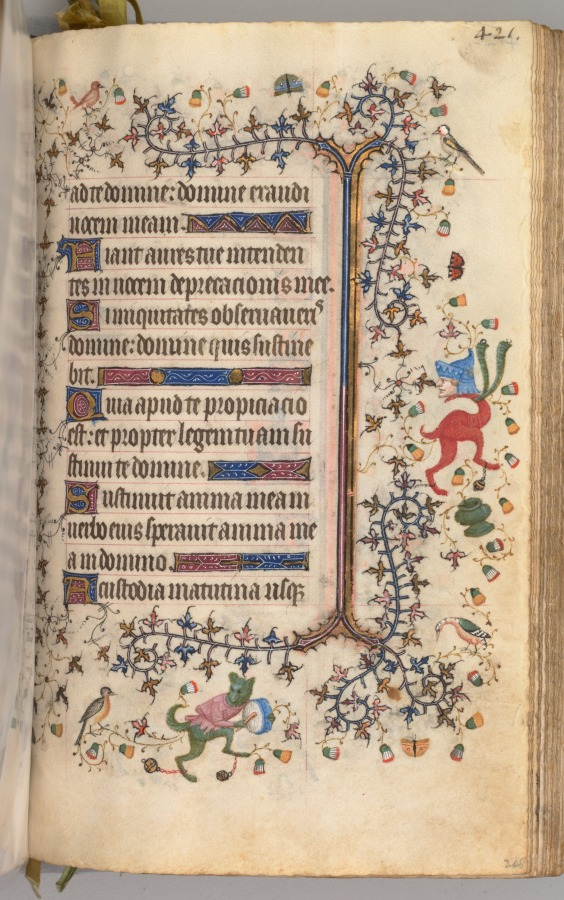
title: Hours of Charles the Noble, King of Navarre (1361-1425): fol. 205r, Text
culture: France, Paris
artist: Master of the Brussels Initials and Associates (French)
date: c. 1405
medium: ink, tempera, and gold on vellum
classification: Bound Volume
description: This precious volume was obviously highly prized by its owner, the French-born King of Navarre, who had his coat of arms painted on no less than twenty folios. Rather than directly commissioning this manuscript from a specific workshop, it seems that Charles the Noble acquired his book of hours -- perhaps ready-made for the luxury market -- while on a trip to Paris in 1404-05. A collaborative effort, six painting styles are evidenced within the pages of this codex, those of two Italians, two Frenchmen, and two Netherlanders. The painter who was responsible for the planning and decoration of the book, and who produced seventeen of the large miniatures, was a Bolognese artist known as the Master of the Brussels Initials. His principal assistant, responsible for most of the borders, was a Florentine who signed his name "Zecho" da Firenze on folio 208 verso.